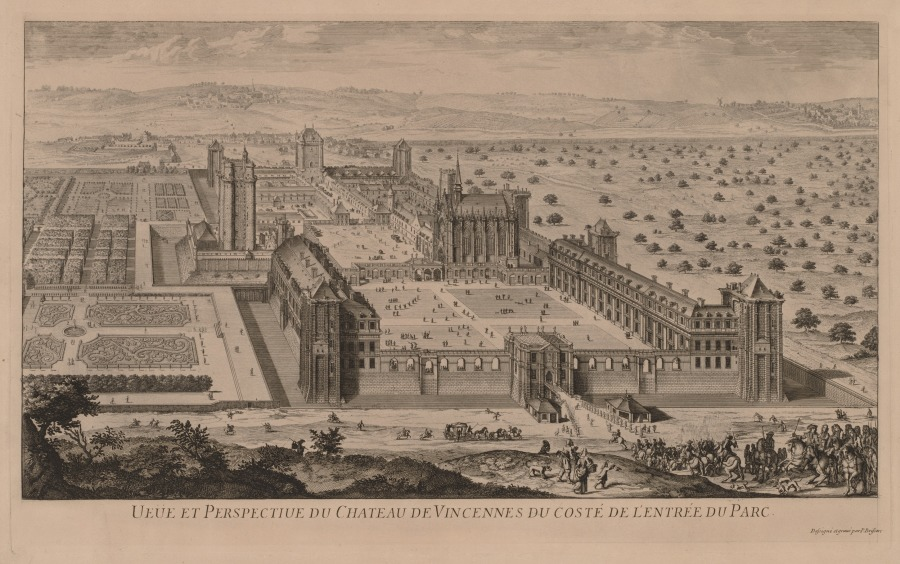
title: Perspective of Château of Vincennes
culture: France, 17th century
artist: Pierre Brissart (French)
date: c. late 1600s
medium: engraving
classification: Print